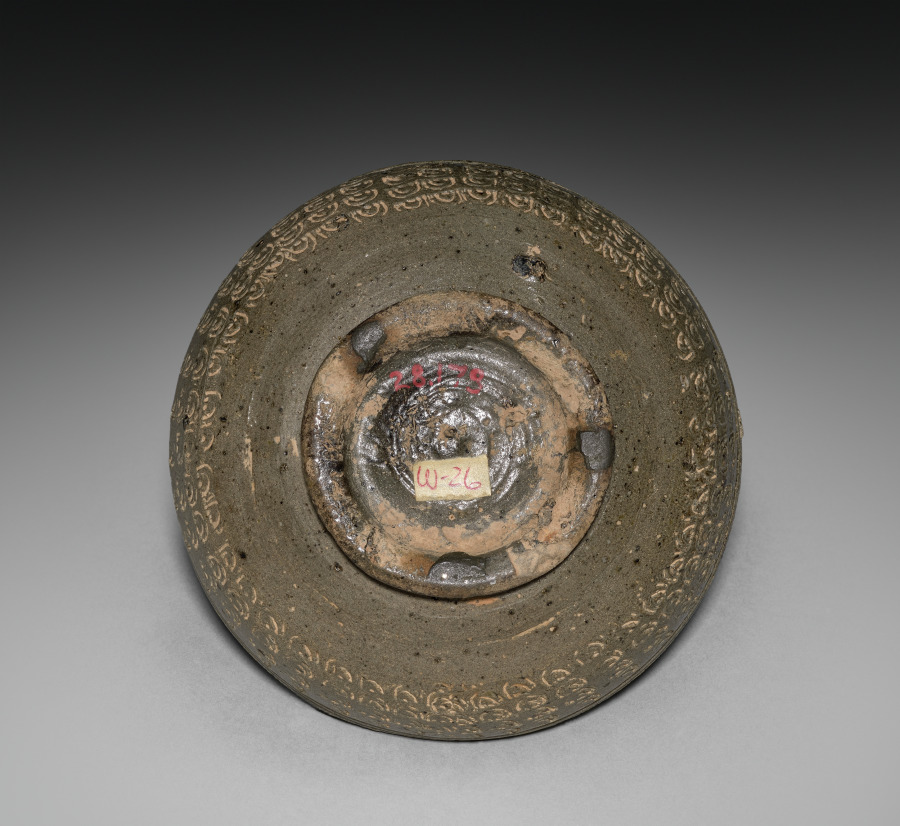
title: Burial Urn with Stamped Design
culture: Korea, Unified Silla period (676-935)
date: 500s–600s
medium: stoneware with stamped designs under olive-green glaze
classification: Ceramic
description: After the introduction of Buddhism, cremation became a common practice in Korea. This jar, which once contained the remains of the dead, may have nested in a larger stone container. The repetitive patterns that appear on the lid and the container was done with a stamping technique.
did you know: Containing the remains of the dead, this type of ancient clay pottery was excavated from tombs.